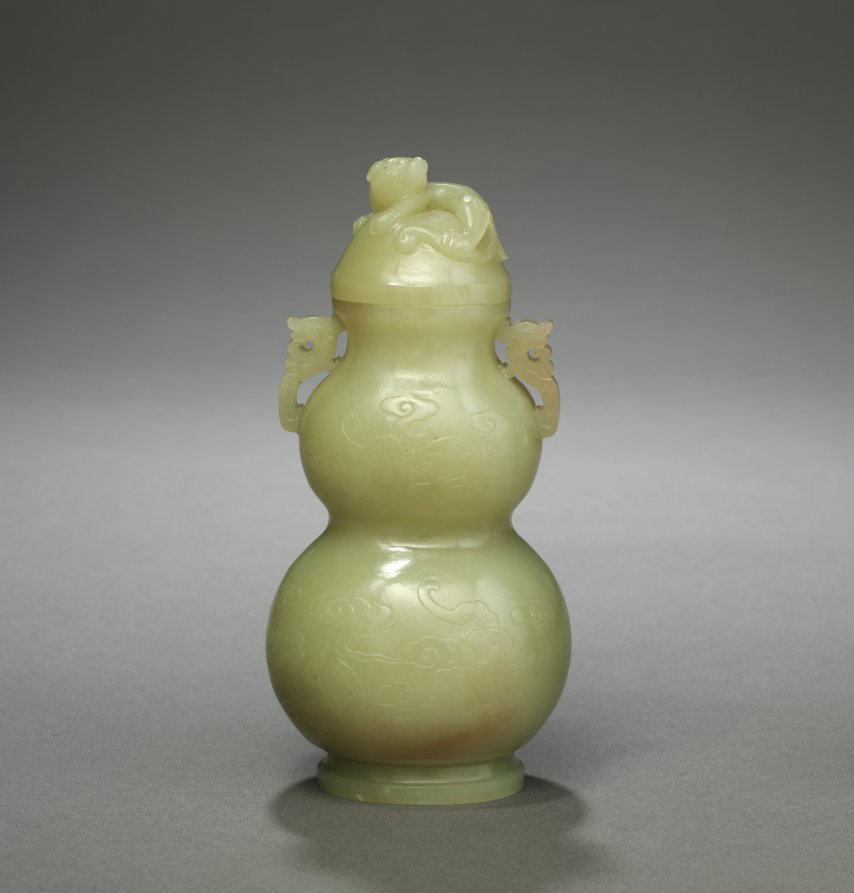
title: Gourd-Shaped Vase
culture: China, Qing dynasty (1644–1911)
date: late 1700s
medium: yellowish-green jade with brown markings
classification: Jade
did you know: Gourds auspiciously reference fertility due to their abundant seeds.